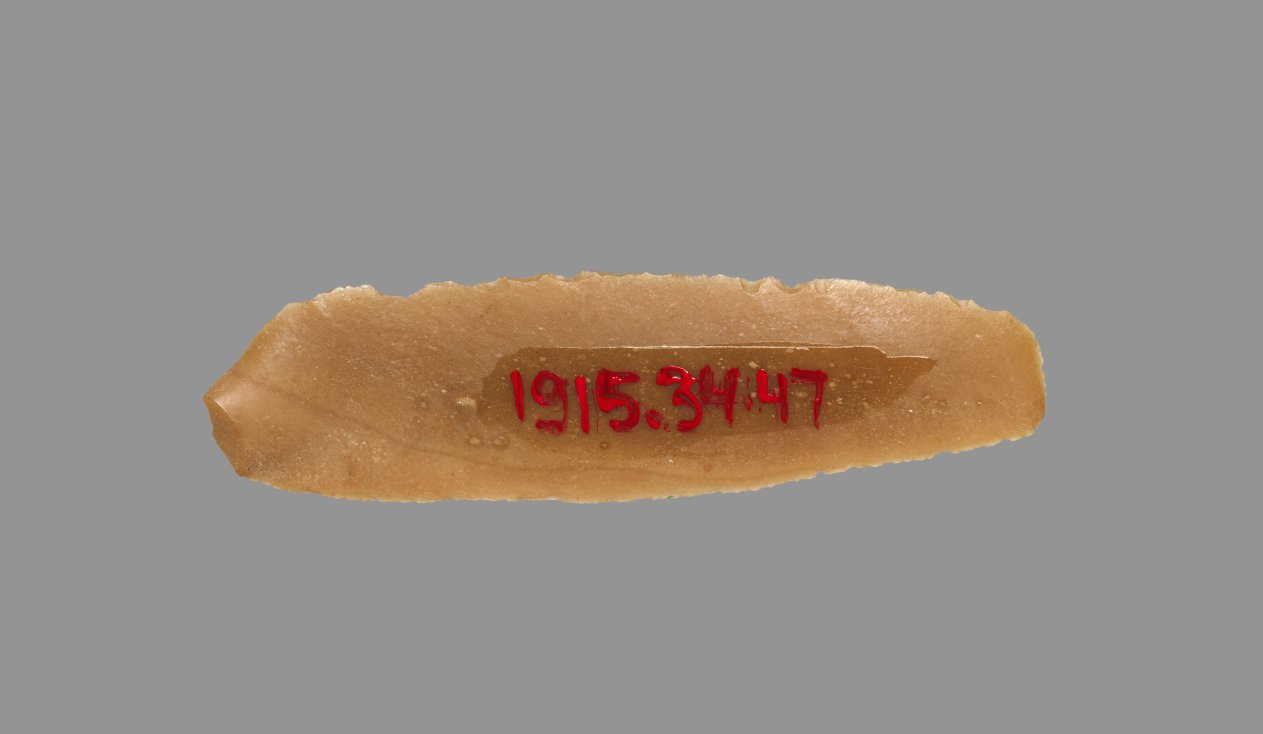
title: Sickle Blade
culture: Egypt, Middle Kingdom (2040–1648 BCE), Dynasty 12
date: 1980–1801 BCE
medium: flint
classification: Implements